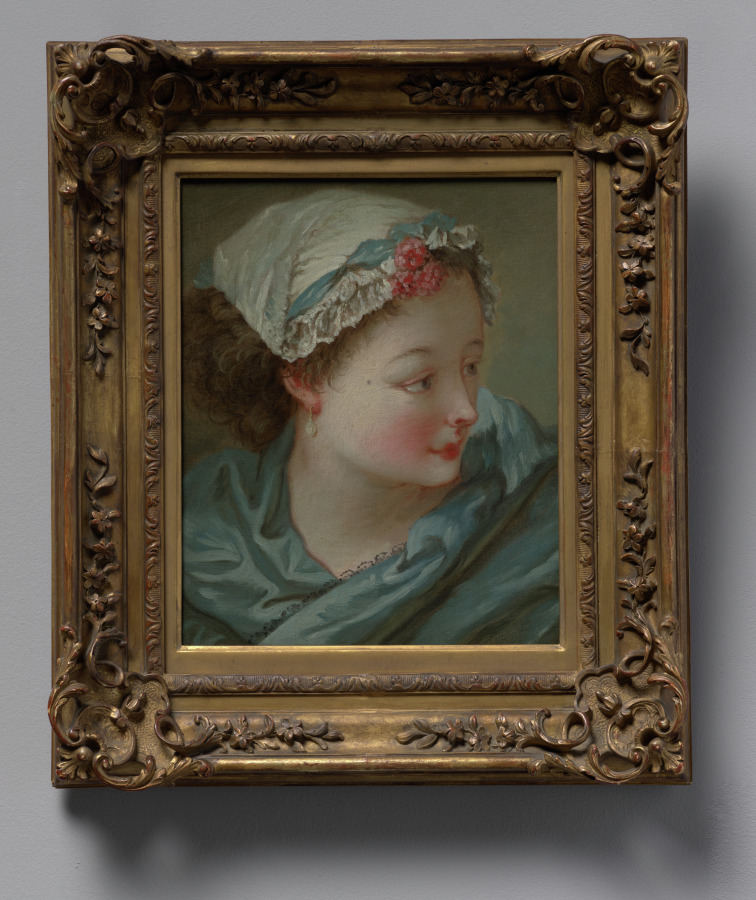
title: Head of a Young Woman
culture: France, 18th century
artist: François Boucher (French, 1703–1770)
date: early 1730s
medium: oil on canvas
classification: Painting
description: This work was catalogued as "style of Chardin" when it entered the museum's collection, and was considered a minor rococo revival work of the 1800s. In 2011, the museum asked Alastair Laing, the leading scholar of the artist Boucher, to study it. He confirmed that the painting is a rare survival from the artist's early career—one of only two known oil studies of this type by the artist.